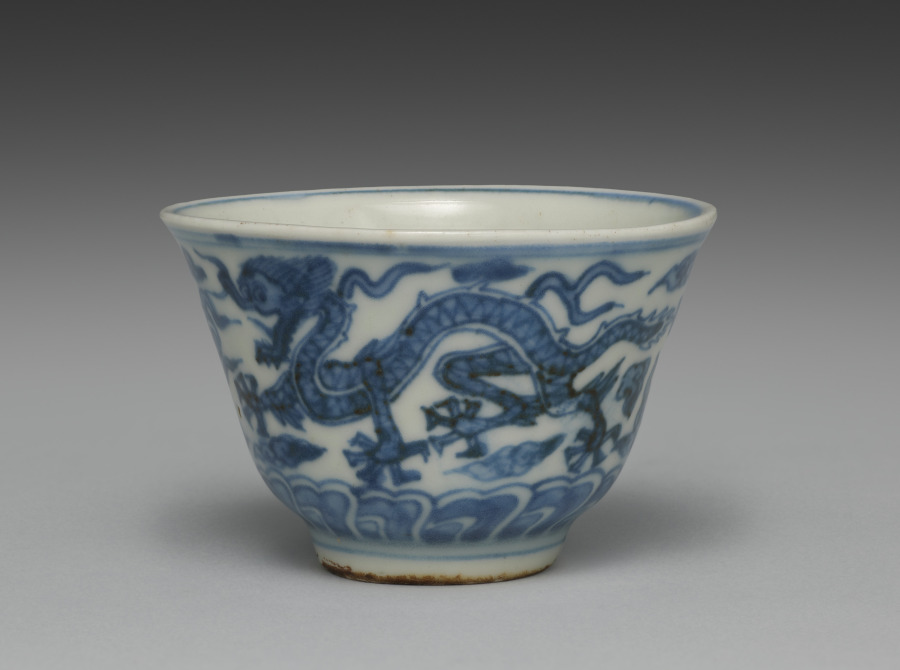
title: Cup from Tea Cups with Dragons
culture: Japan, Edo period (1615–1868)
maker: Seifū Yohei I (Japanese, 1801–1861)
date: 1840s–57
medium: One from a set of five tea cups; porcelain with underglaze blue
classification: Ceramic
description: Seifū Yohei I made both blue and white porcelains after Ming dynasty (1368–1644) Chinese wares fired in the kilns at Jingdezhen for export. He also made colorful stoneware in the style of his teacher, Nin’ami Dōhachi (Takahashi Dōhachi II) (1783–1855).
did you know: A small figure of an elephant serves as the handle for the lid.